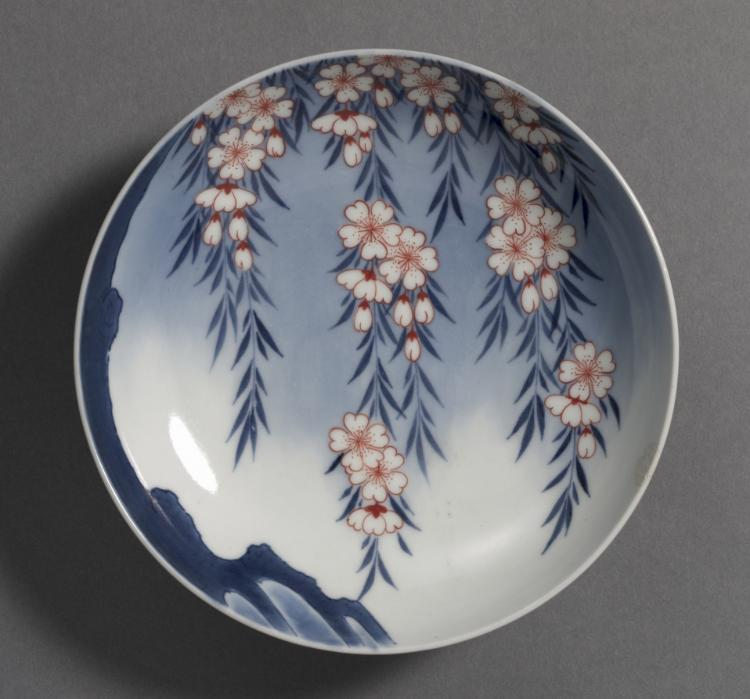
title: Dish with Weeping Cherry Tree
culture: Japan, Meiji period (1868–1912)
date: late 1800s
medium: Porcelain with underglaze blue and overglaze red enamel (Hizen ware, Nabeshima type)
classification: Ceramic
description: This dish depicts a cherry tree (sakuragi) whose flower-laden branches are the centerpiece while the sliver of a trunk and roots appear on the left edge. The sakura blossoms are delicately depicted in an iron-red overglaze. The flowers’ various positions (facing out and downward) and stages of maturity (bud and full bloom) enhance the naturalism and dynamism of the image.